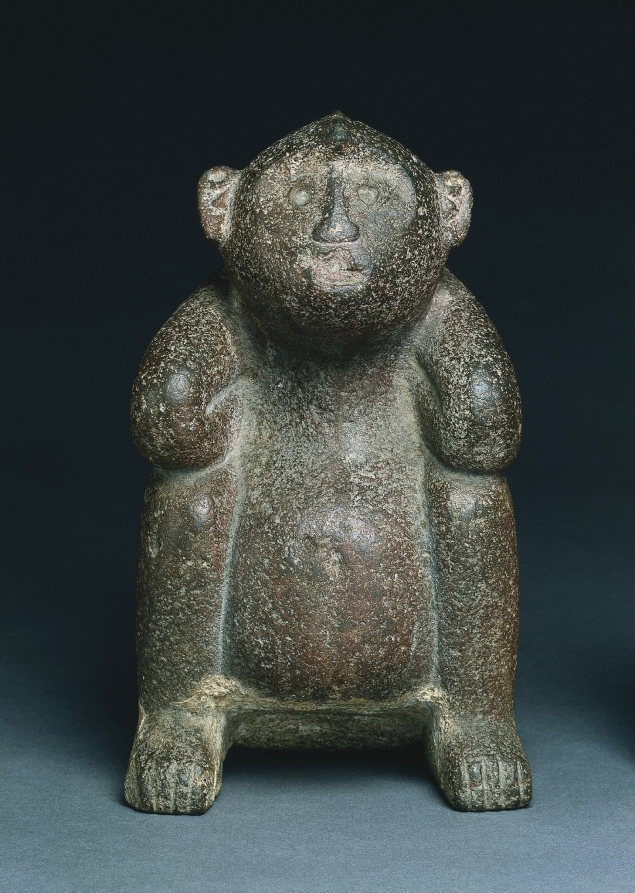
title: Monkey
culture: Central Mexico, Tacuba, Aztec, Post-Classic Period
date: 1325–1519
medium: stone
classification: Stone